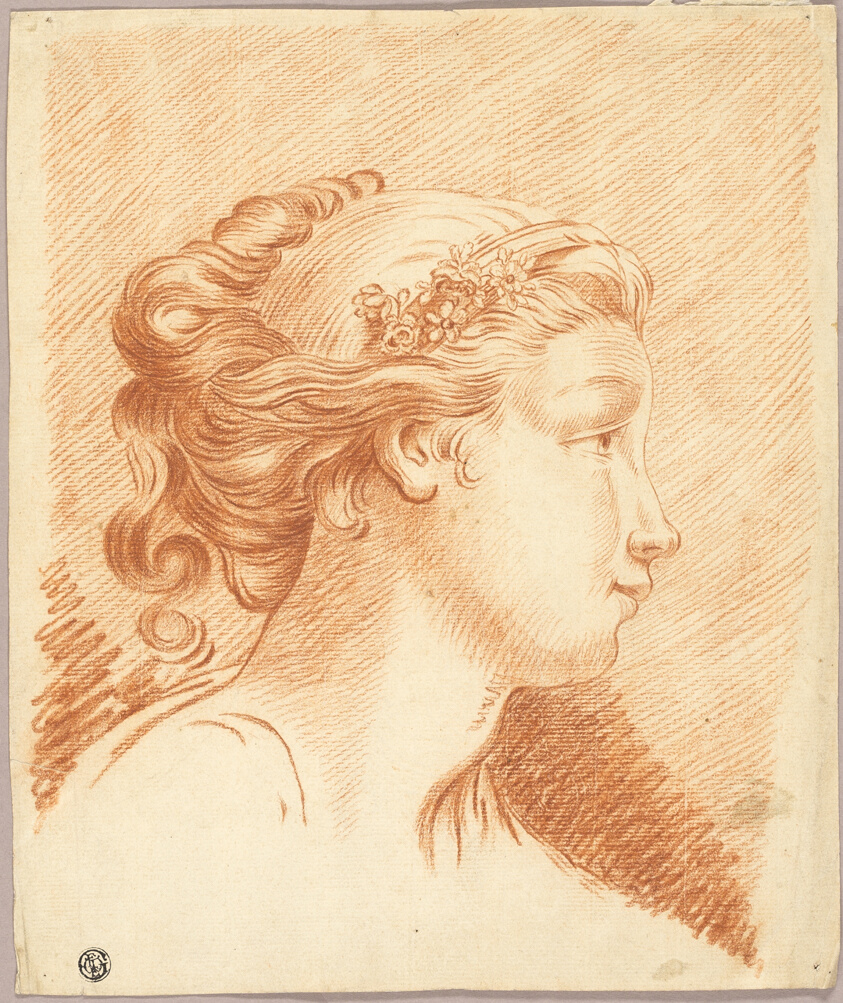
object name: Drawing and Watercolor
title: Head of Girl in Profile to Right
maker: François Boucher (French, 1703-1770)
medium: Red chalk on cream laid paper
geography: France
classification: chalk; drawings (visual works); prints and drawing